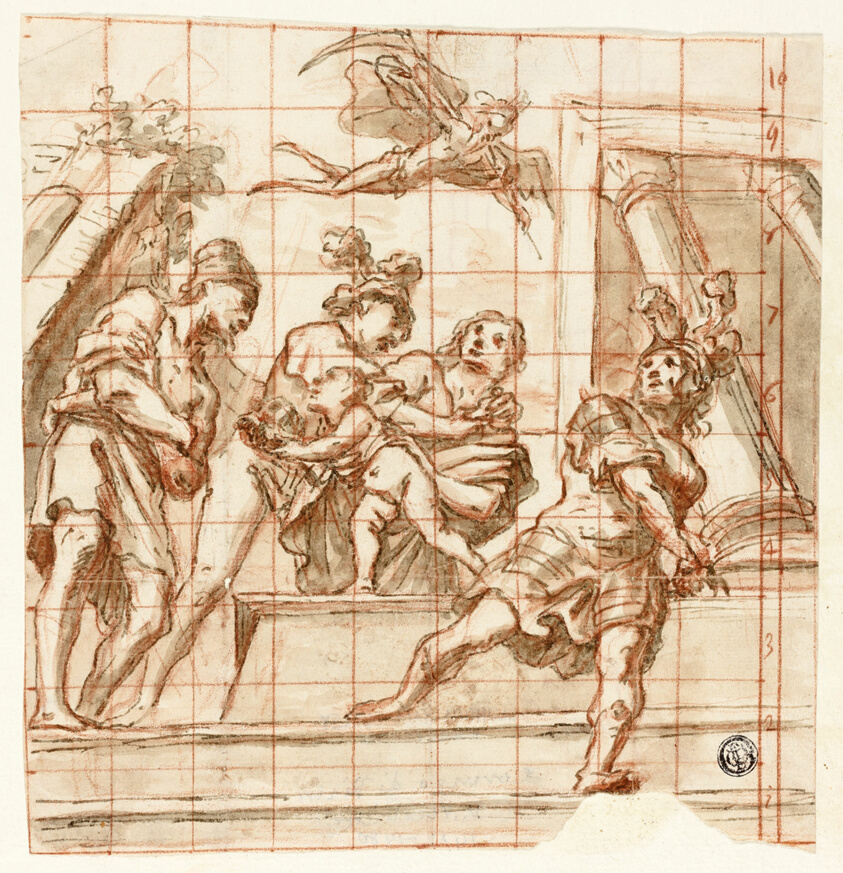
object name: Drawing and Watercolor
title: Allegorical Scene with Father Time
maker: Attributed to Pietro della Vecchia (Italian, 1605-1678); or Vecchietta (Lorenzo di Pietro di Giovanni) (Italian, 1410-1480); or Piero di Cosimo (Italian, 1462-1521)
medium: Pen and brown ink, over red chalk, with brush and brown wash and red chalk wash, squared in red chalk, on ivory laid paper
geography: Italy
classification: pen and ink drawings; drawings (visual works); prints and drawing